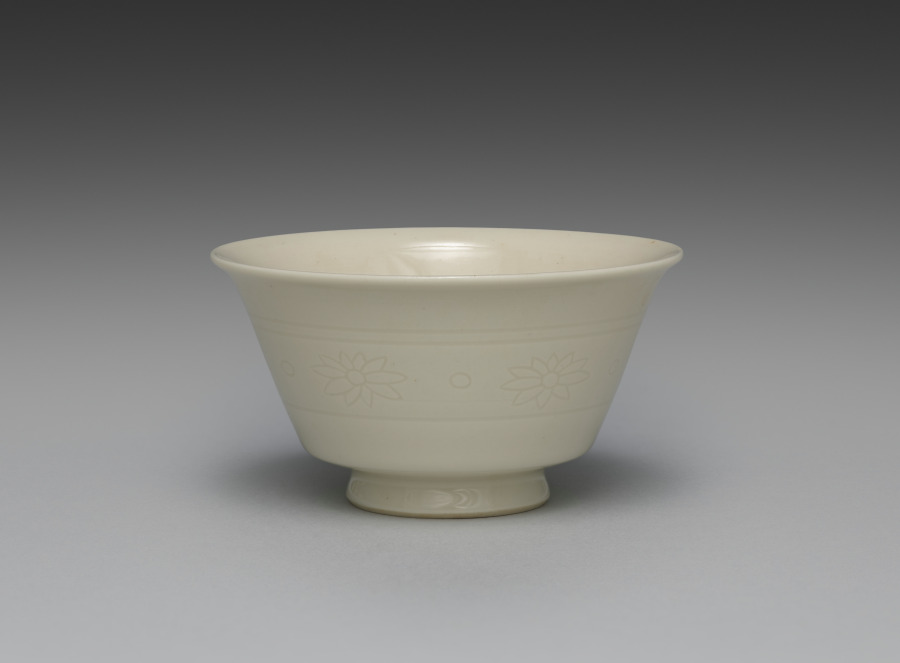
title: Teacup from Teacups with Floral Band Motif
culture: Japan, Meiji period (1868–1912)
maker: Seifū Yohei III (Japanese, 1851–1914)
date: 1893–1914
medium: One from a set of five cups; porcelain with incised decoration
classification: Ceramic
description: The five sencha teacups in this set are decorated with incised flowers and dots between a double band at the top and a single band at the bottom. They are in Yohei III’s creamy taihakuji body and glaze. In their motifs, they are quite similar to an incense burner by Yohei III (see CMA 2022.180), but the flowers are even more simple in design, with no open circle at the center. A label affixed to the side of the box refers to them as “sencha cups in emulation of Korean white [ware].” The reference to Korean ware indicates that even though Yohei was more directly inspired by Qing-dynasty wares from the Dehua kilns in Fujian Province in developing his porcelain clay and glaze for works such as these, the general understanding of the continental models still placed them, at least in terms of color, among pieces broadly associated in Japan with Korean white wares. The delicate cups are thinly potted, so they have a highly desirable translucency.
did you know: The delicate cups in this set are thinly potted, so they have a highly desirable translucency.